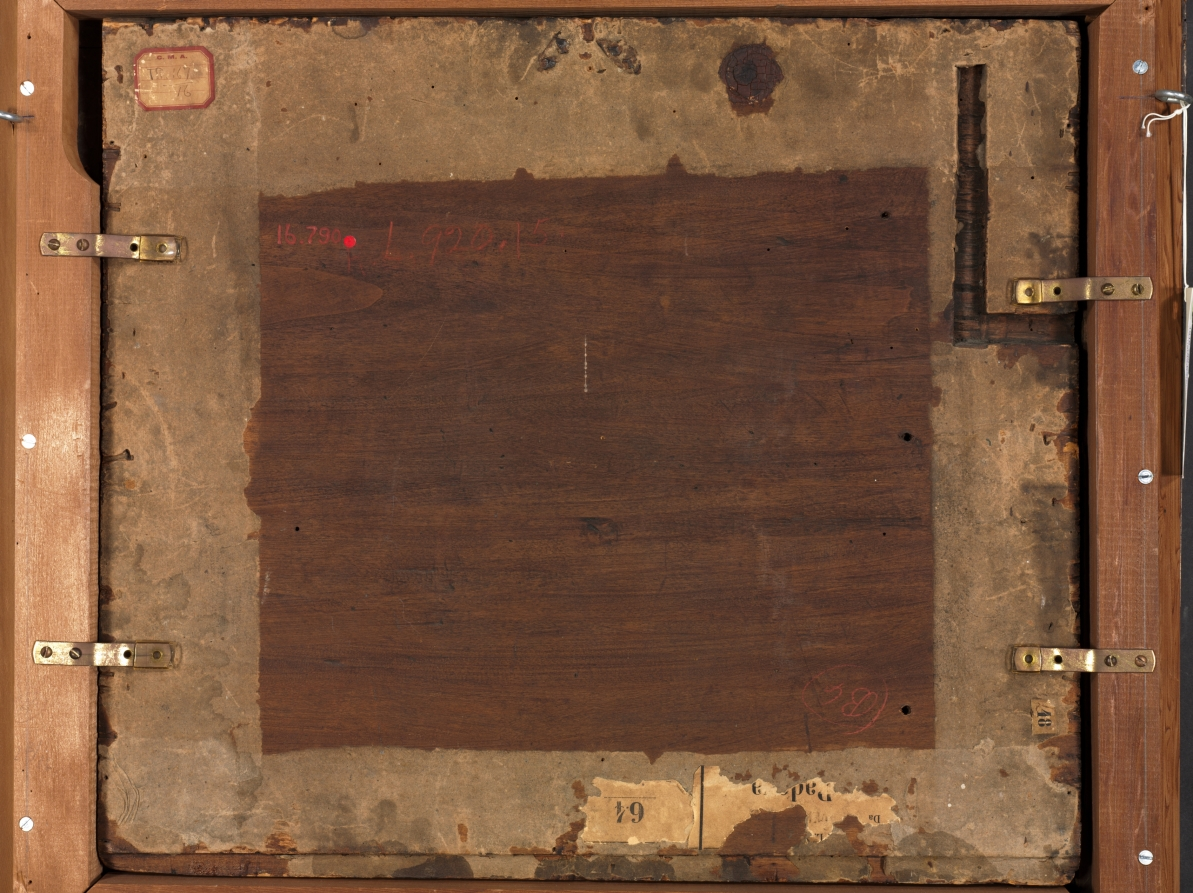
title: Procession of the Magi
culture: Italy, Padua, 15th century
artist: attributed to Bernardo Parentino (Italian)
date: c. 1450–1500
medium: tempera on wood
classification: Painting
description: This work was not originally hung on a wall or displayed as part of an altarpiece. It is believed to have formed a panel on a cassone, a storage chest for clothing. This panel may have been part of a travel chest, which was usually less lavish than those meant to be used in the home. The subject, the Procession of the Magi, was commonly used for travel chests.